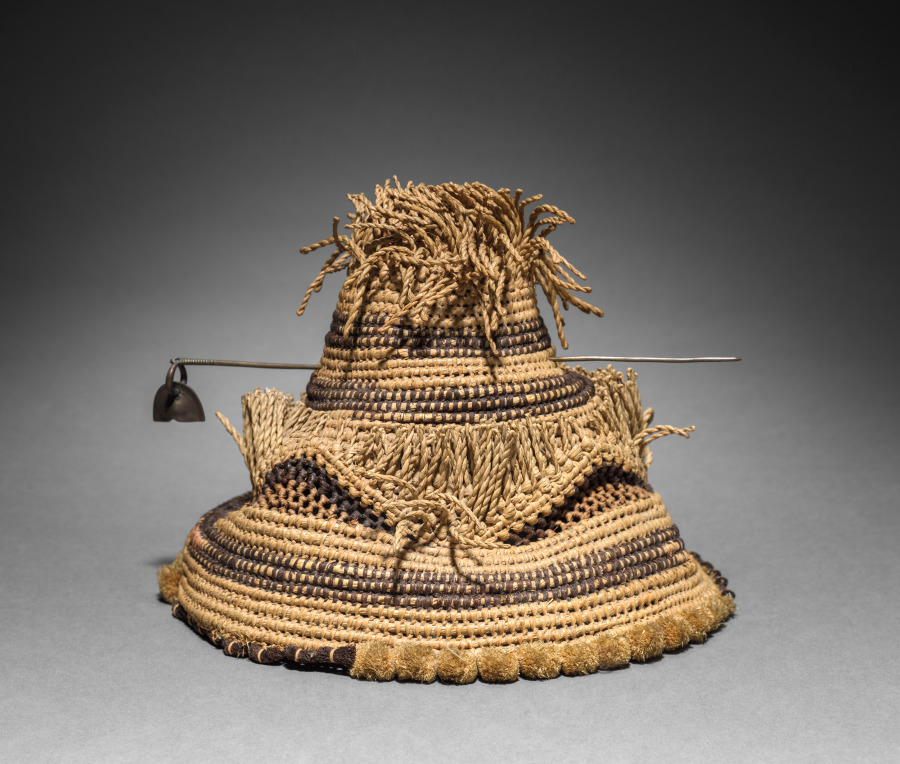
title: Hat (laket mishiing) with Pin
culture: Africa, Central Africa, Democratic Republic of Congo, early 20th century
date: early 1900s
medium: Raffia, metal, and dye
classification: Garment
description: Titled Kuba men and prominent women wear the laket, a small ornate dome-shaped hat. An essential fashion item of adult men in good social standing, it focuses special attention on the head as a significant marker of individual identity, ethnic affiliation, status, and role in society. This prestige object is secured on the crown of the head with a nine-and-a-half-inch metal pin that pierces through the hat onto a clump of hair. The laket is made from raffia palm fiber coiled into threads and woven in two alternating patterns and contrasting light and dark (dyed) wefts. There are two examples of the laket: the plain type with the flat top, and the more elaborate type called the laket mishiing.